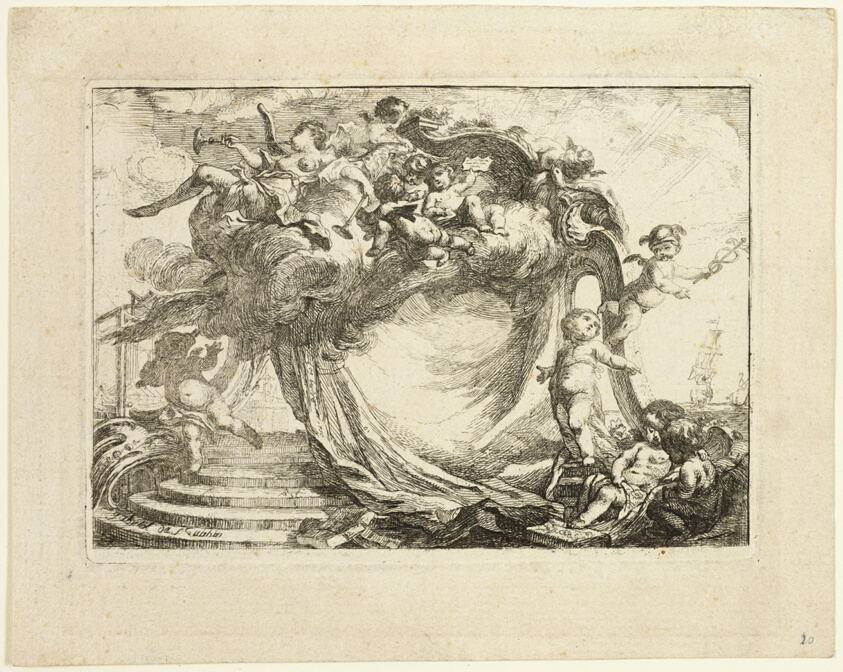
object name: Print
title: Vignette for an Address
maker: Gabriel Jacques de Saint-Aubin (French, 1724-1780)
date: 1752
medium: Etching on ivory wove paper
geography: France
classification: etching; print; prints and drawing